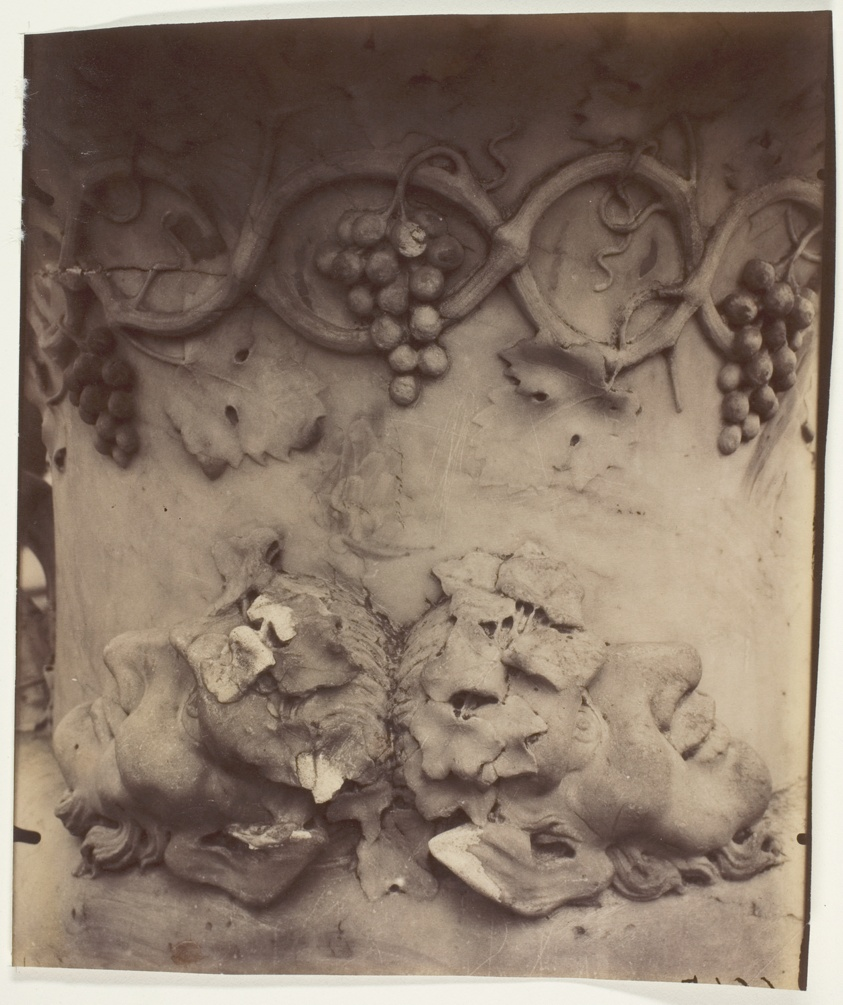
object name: Photograph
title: Versailles, Vase (Detail)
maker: Jean-Eugène-Auguste Atget (French, 1857–1927)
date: 1906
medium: Albumen print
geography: France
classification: albumen silver print; photographic process; photography; photograph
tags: Collected by Hugh Edwards